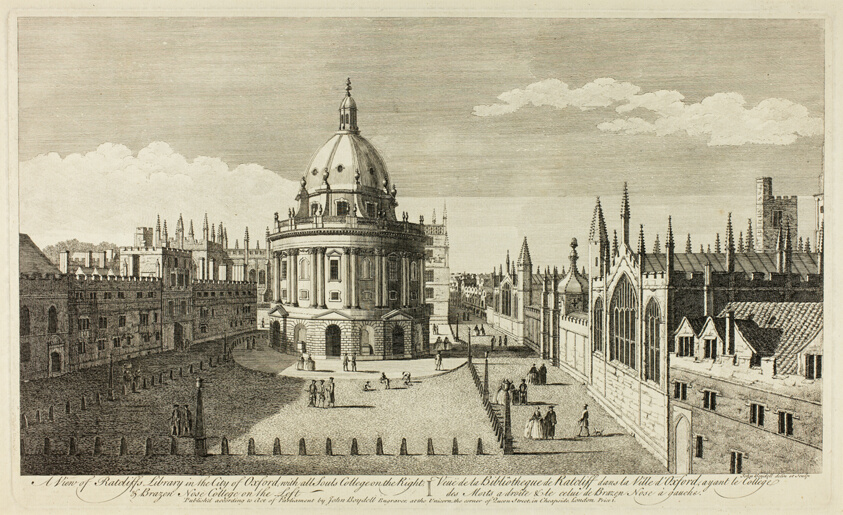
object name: Print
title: View of Ratcliff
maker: John Boydell (English, 1719-1804)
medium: Engraving on paper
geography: England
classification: etching; print; prints and drawing